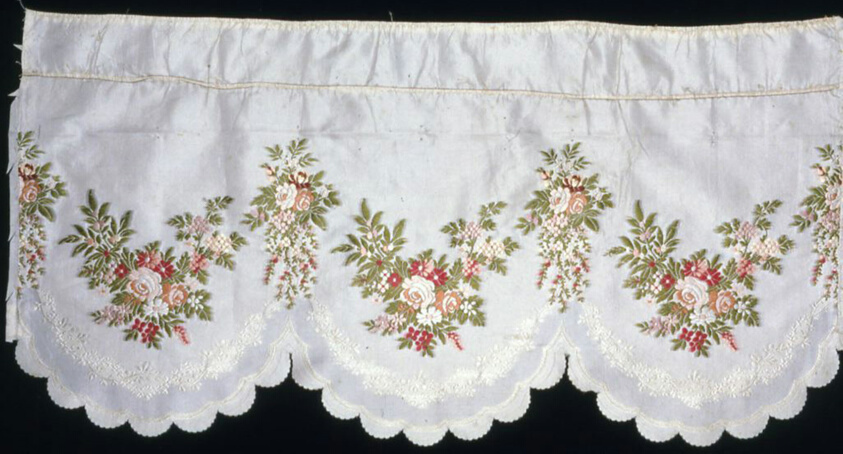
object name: Textile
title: Six Flounces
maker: France, Lyon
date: c. 1850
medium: Silk, warp-faced plain weave; brocaded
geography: France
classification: textile; weaving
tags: fashion